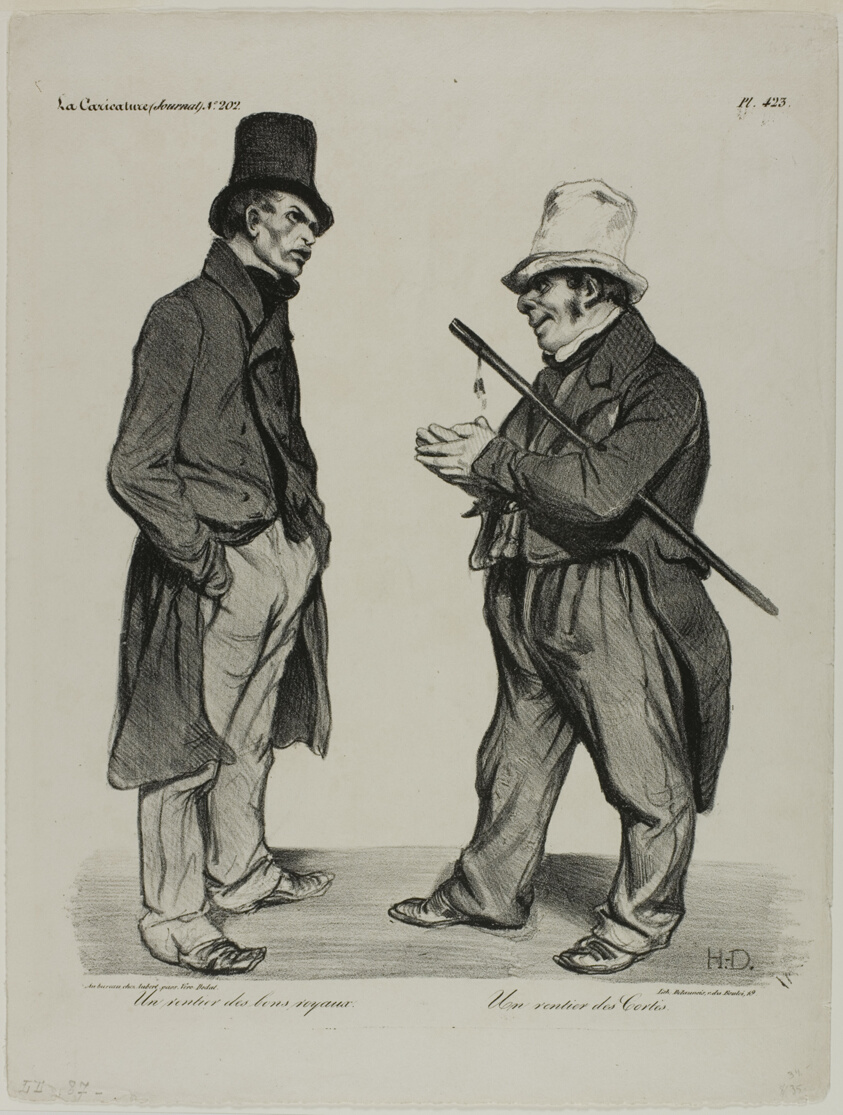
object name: Print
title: An Investor of Spanish Cortes Bonds. An Investor of Spanish Government Bonds, plate 423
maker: Honoré Victorin Daumier; French, 1808-1879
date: 1834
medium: Lithograph in black on white wove paper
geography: France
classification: lithograph; print; prints and drawing